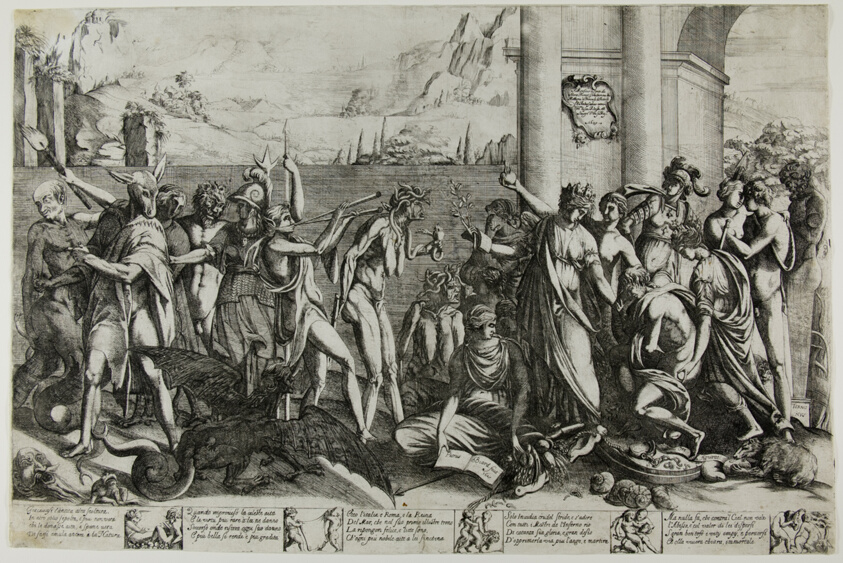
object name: Print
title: An Allegory of Statuary or Lament of Sculpture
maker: Pierre Biard, II (French, 1592-1661)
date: 1629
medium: Etching in black on ivory laid paper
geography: France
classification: etching; print; prints and drawing